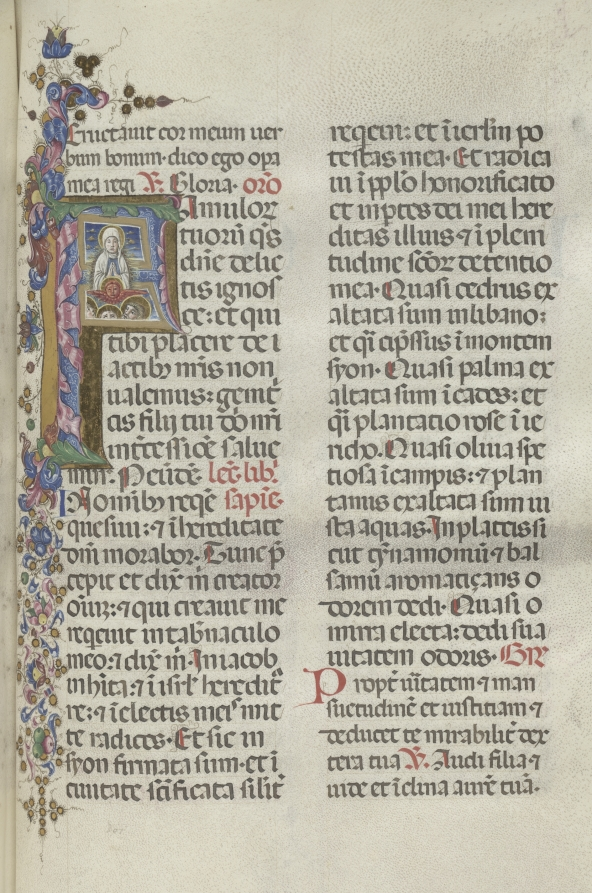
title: Missale: Fol. 306: Assumption of the Virgin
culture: Italy, Perugia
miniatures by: Bartolommeo Caporali (Italian, c. 1420–1503)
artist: assisted by Giapeco Caporali (Italian, d. 1478)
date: 1469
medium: ink, tempera and burnished gold on vellum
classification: Bound Volume